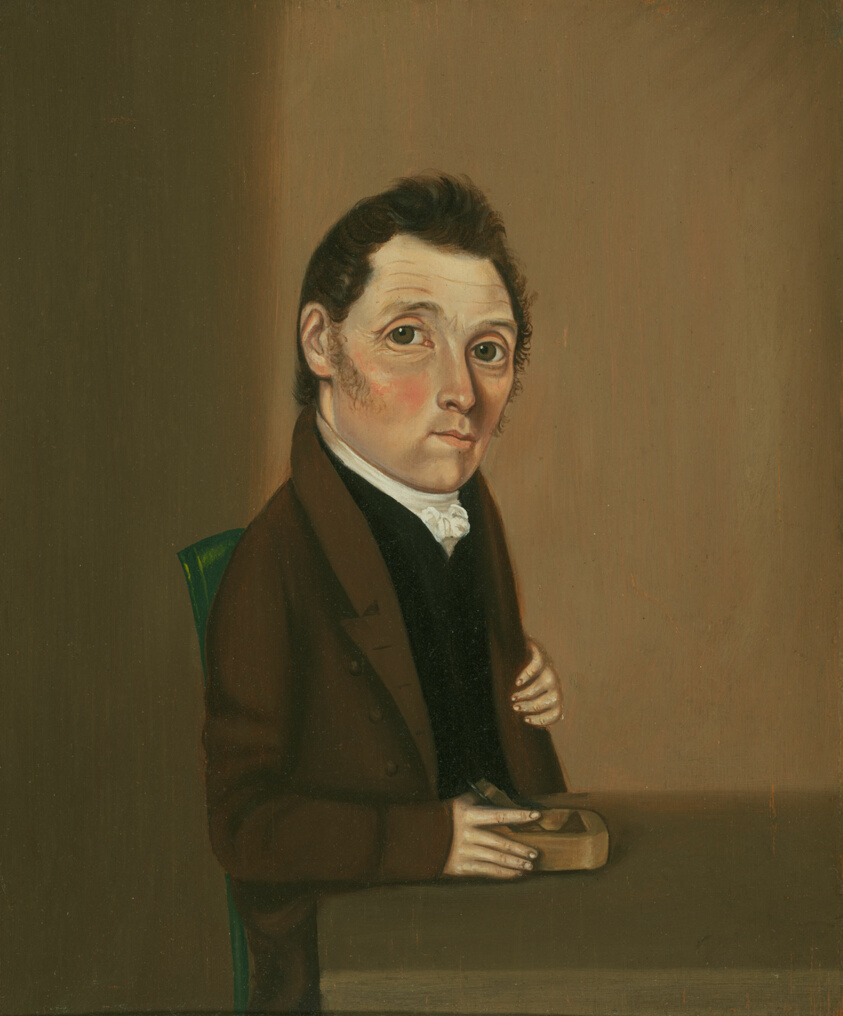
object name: Painting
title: William Bonham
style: Folk Art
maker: William Bonnell (American, 1804–1865)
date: March 4, 1825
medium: Oil on panel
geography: United States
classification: painting; american arts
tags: fashion, people, portraits